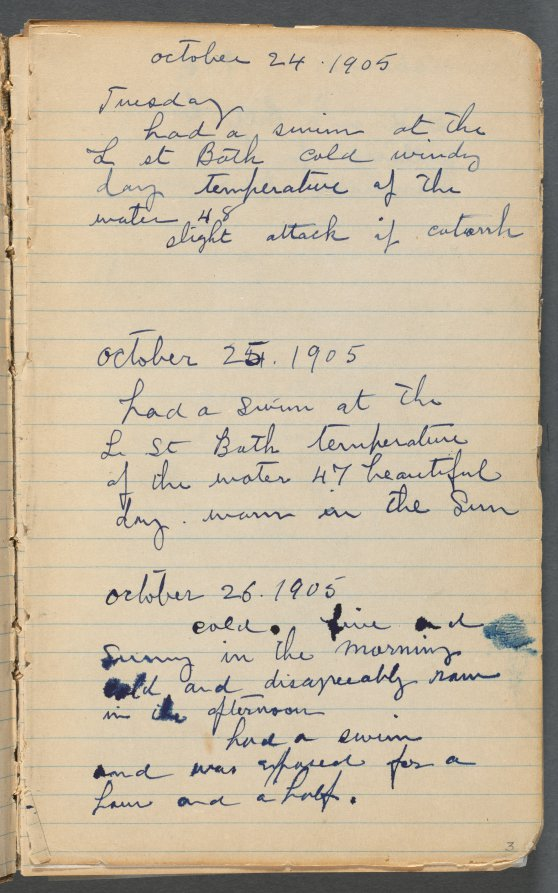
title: Sketchbook, page 003: Notes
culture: America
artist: Maurice Prendergast (American, born Newfoundland [now Canada], 1858–1924)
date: 1905–10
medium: graphite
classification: Bound Volume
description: This sketchbook contains 69 pages of drawings, a diary largely devoted to the state of the artist's health, and a three-page discourse on the nature of genius and ideas.